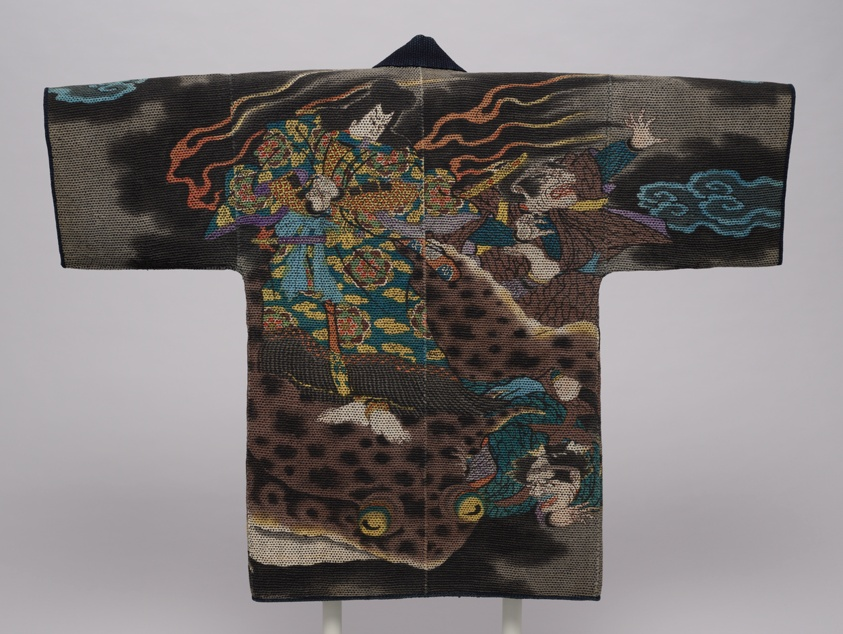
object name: Textile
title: Fireman's Coat (Hikeshi Sashiko Banten)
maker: Japan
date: Meiji period (1868–1912), c. 1875-1900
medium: Cotton, plain weave, quilted (sashiko); painted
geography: Japan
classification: textile; needlework (visual works)